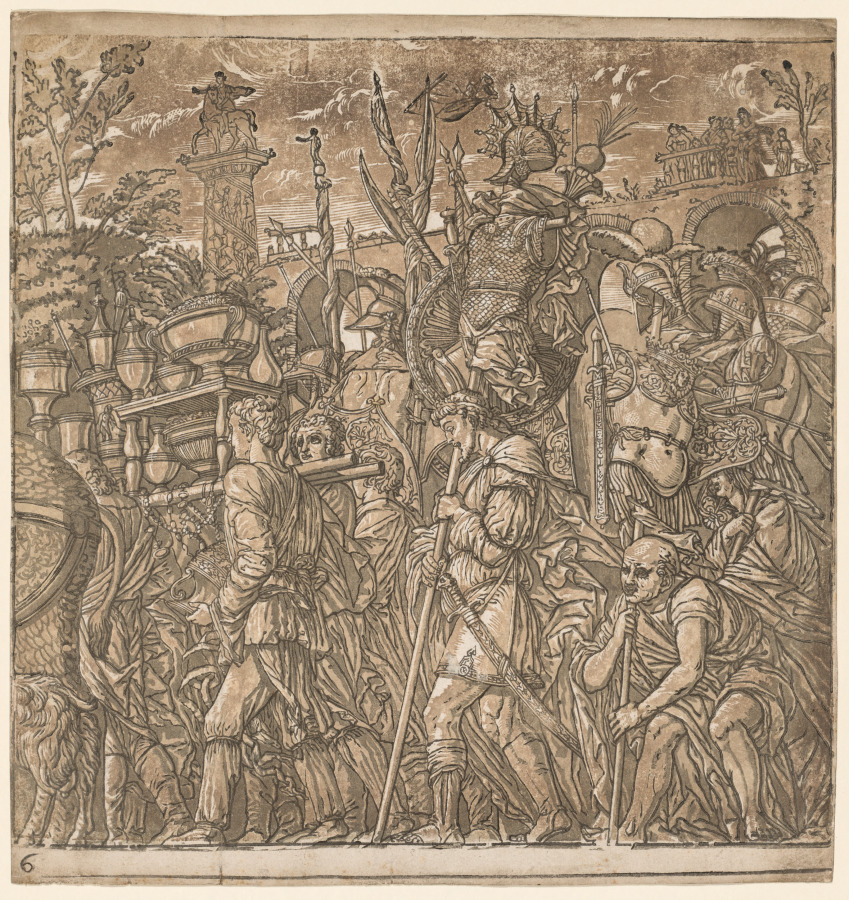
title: The Triumph of Julius Caesar: Soldiers Carrying Vases and Trophies of War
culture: Italy, 16th century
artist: Andrea Andreani (Italian, about 1558–1610)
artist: after Andrea Mantegna (Italian, about 1431–1506)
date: 1593–99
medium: chiaroscuro woodcut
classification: Print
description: Commissioned by Duke Vincenzo Gonzaga, this series of chiaroscuro woodcuts reproduces Andrea Mantegna’s Triumph of Julius Caesar, painted a century earlier. The scenes imaginatively portray the triumphal procession of the renowned Roman general and consul Julius Caesar following his successful defeat of Gaul in 52 BC. Each section of the continuous frieze shows elements typical of these parades, sanctioned by the Roman Senate and described in ancient texts. The printed suite’s frontispiece features a portrait bust of Mantegna, and the text below boasts that the famous paintings attracted many viewers. People who owned sets of these woodcuts often tacked them up to create a decorative frieze. Andreani issued the prints with a sheet of classical columns that could be cut out and placed between the scenes. Two fragments of these columns, colored orange, still flank the fourth scene.